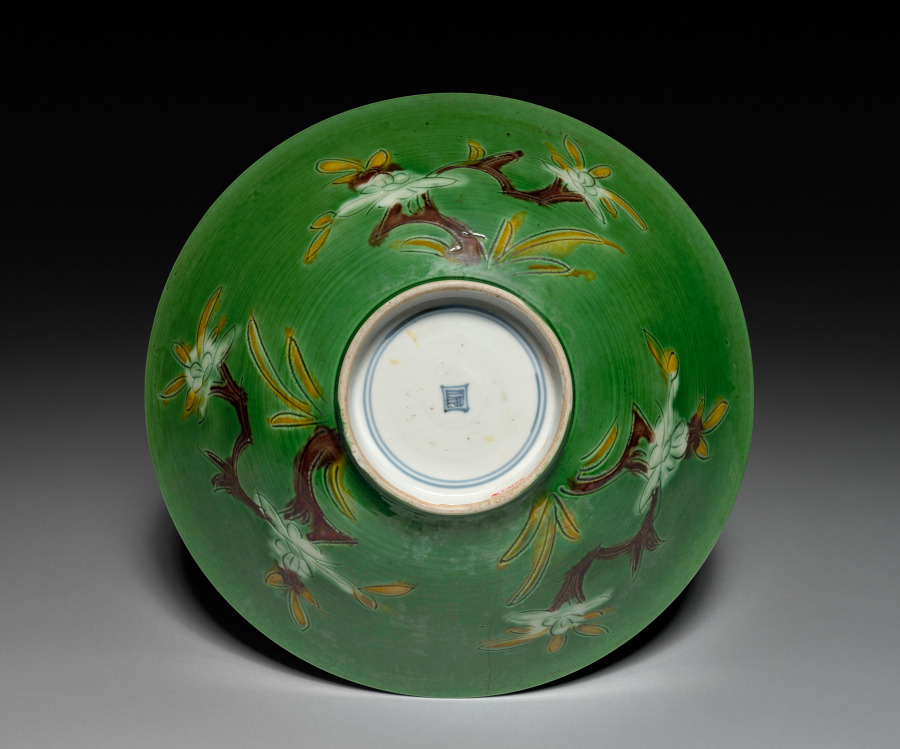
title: Bowl with Sprays of Flowers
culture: China, Jiangxi province, Jingdezhen kilns, Qing dynasty (1644-1911), Kangxi reign (1662-1722)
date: 1662–1722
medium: porcelain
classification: Ceramic